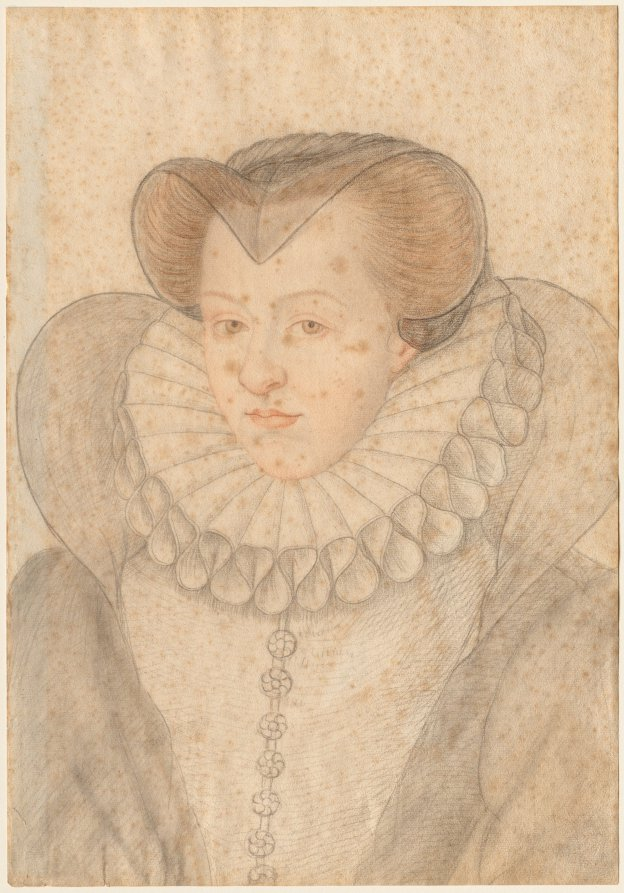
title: Archduchess Elisabeth of Austria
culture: England(?)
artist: Jooris van der Straeten (Flemish, 1552–1577)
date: c. 1567–77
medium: black and red chalk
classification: Drawing